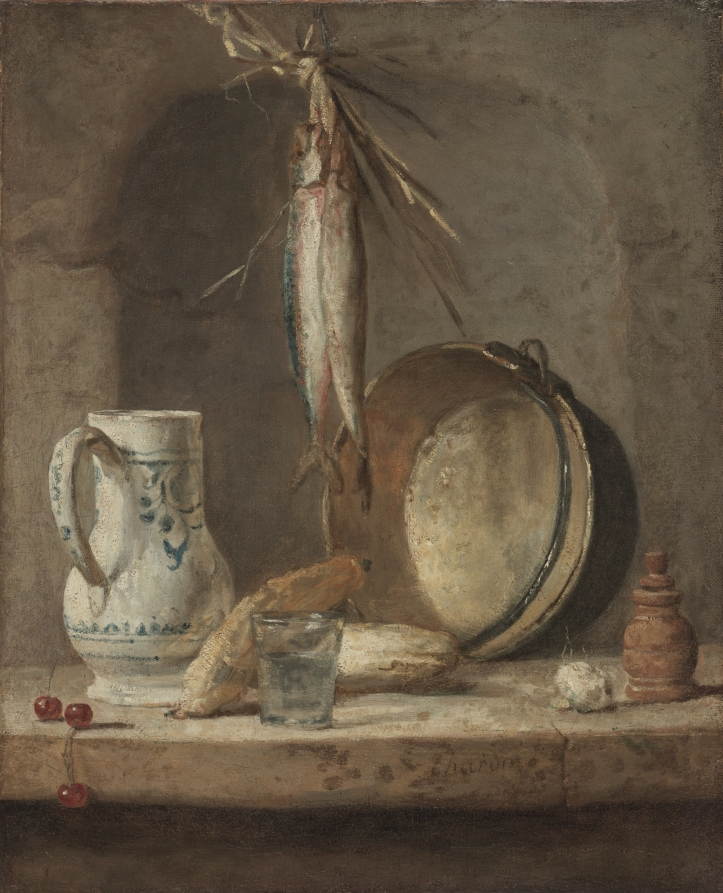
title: Still Life with Herrings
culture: France, 18th century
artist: Jean-Siméon Chardin (French, 1699–1779)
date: c. 1735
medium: oil on canvas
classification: Painting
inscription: Signed lower right: "chardin"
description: Chardin reflected intensely on the act of observation. Still life became a forum for sophisticated performances in paint, and his complex technique—he famously worked in private—uses a staggering combination of delicate glazes and roughly dragged thick paint to capture the varied surfaces, atmospheres, and spaces in this humble pantry shelf. Acutely aware of recent developments in optics and physics, Chardin explored ideas about light, shadow, and color, and fully expected his work to be inspected closely.